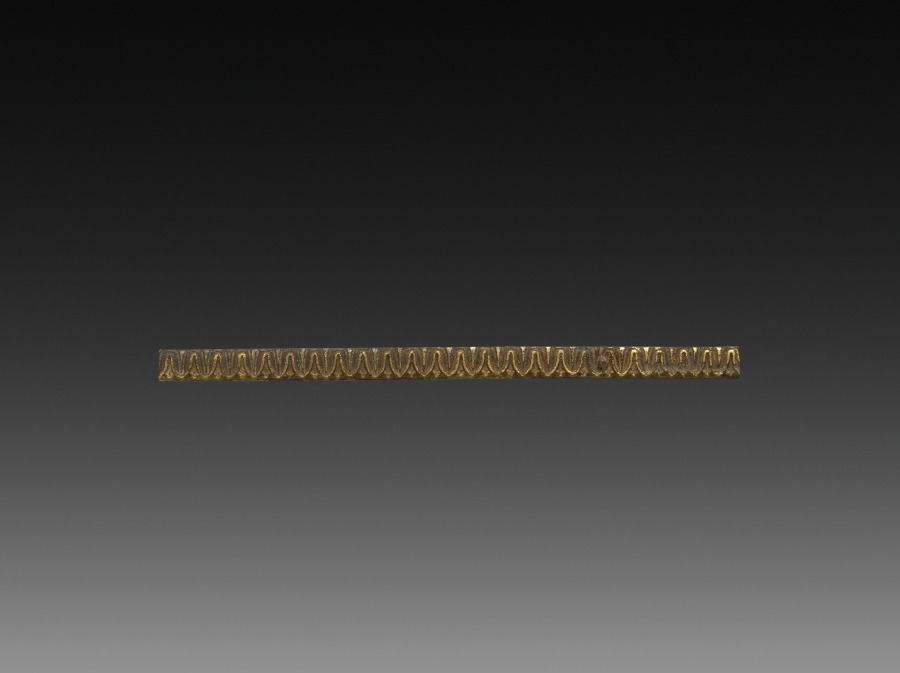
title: Ornamental Detail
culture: France, late 18th century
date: late 1700s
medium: gilt bronze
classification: Metalwork